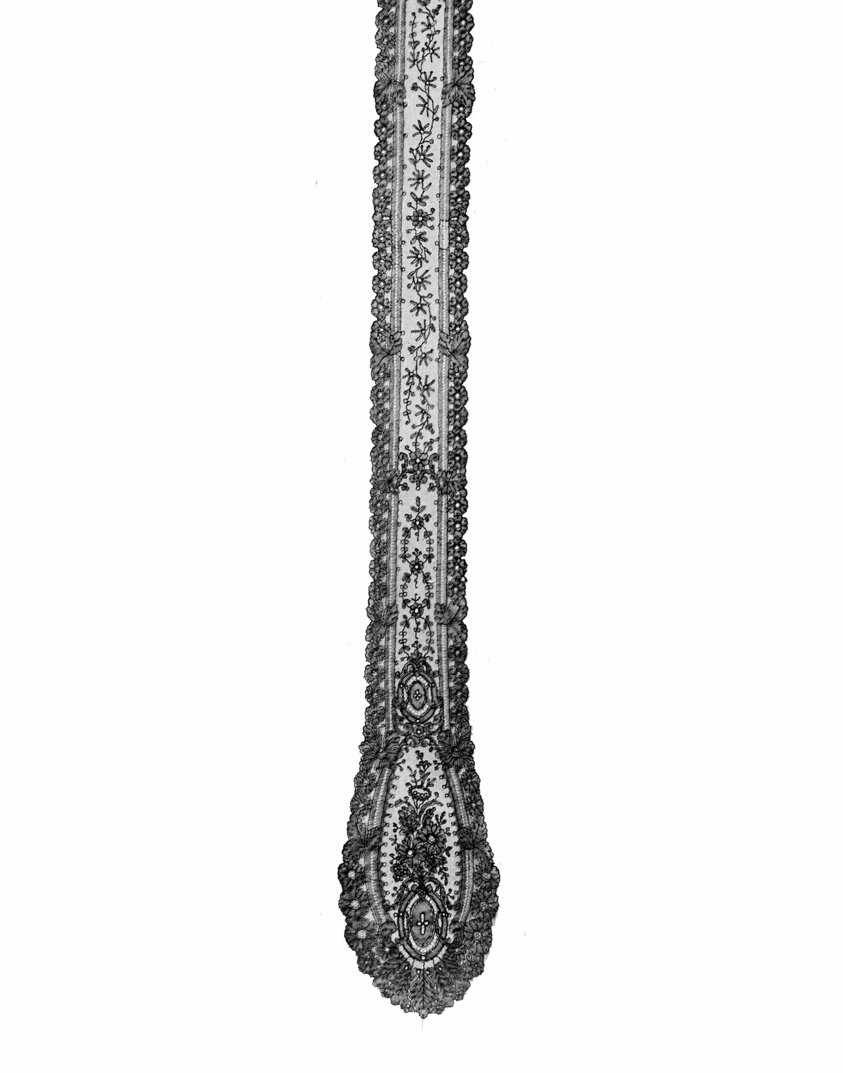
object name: Costume and Accessories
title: Pair of Lappets (Joined)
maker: France, Bayeux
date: 1850s/60s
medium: Silk, bobbin straight lace (made in vertical strips)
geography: France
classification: costume accessory; lace - bobbin; lace; textile; costume; costume accessory - headdress; costume accessory worn above the waist